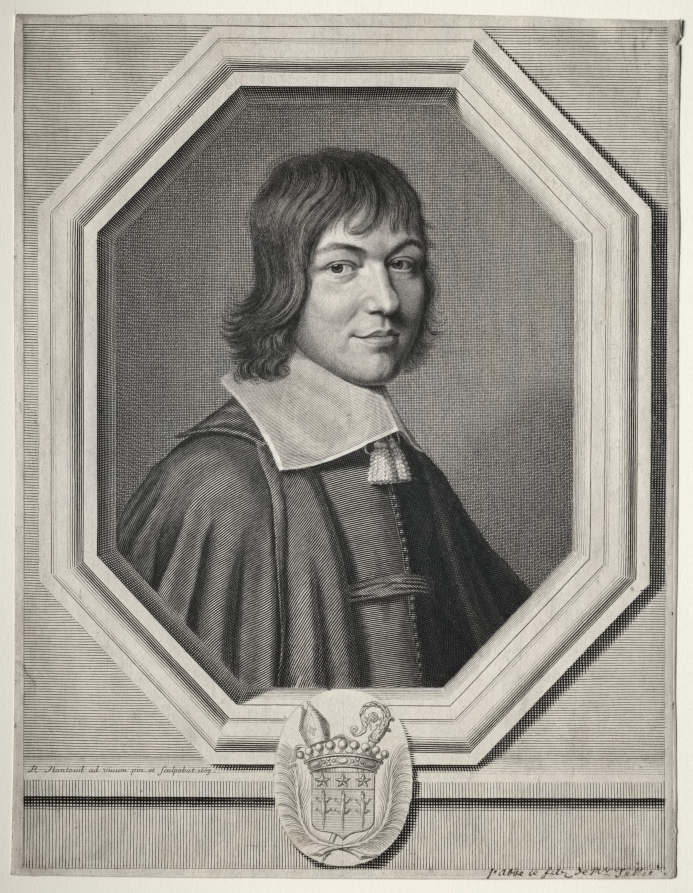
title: Charles Maurice le Tellier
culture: France, 17th century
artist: Robert Nanteuil (French, 1623–1678)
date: 1663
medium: engraving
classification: Print